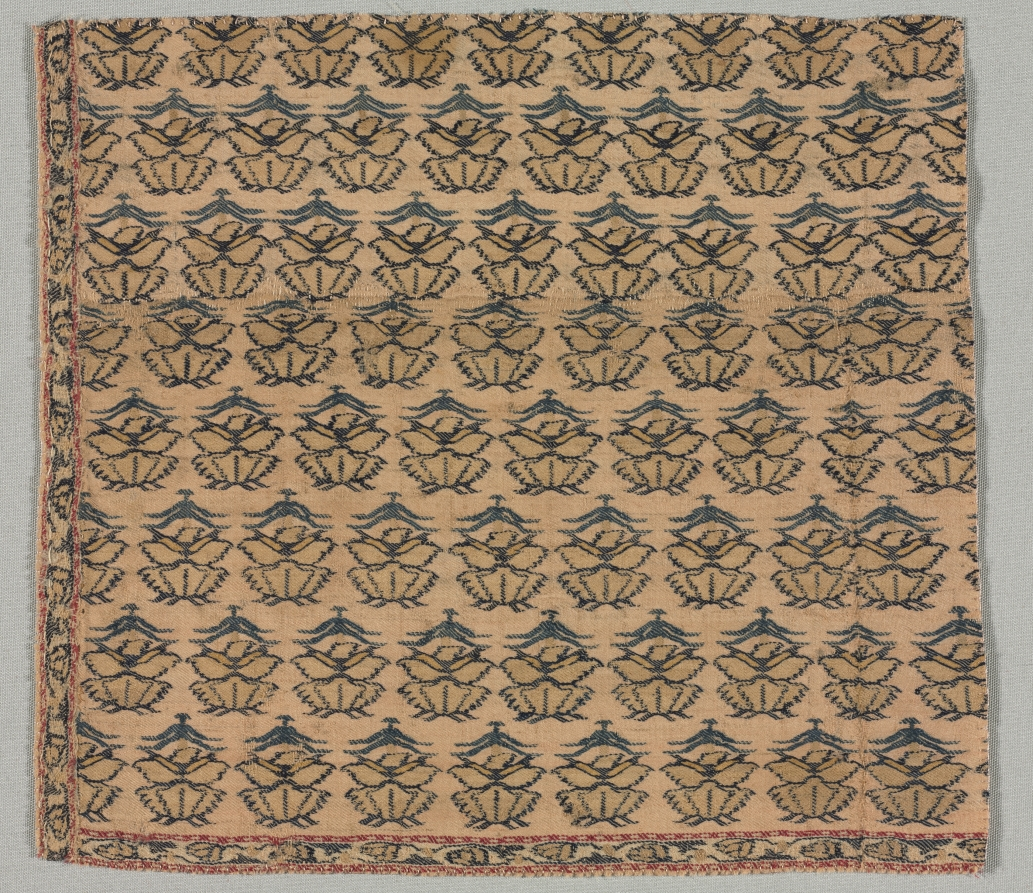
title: Corner Fragment of a Shawl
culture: India, Kashmir, late 18th century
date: late 1700s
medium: tapestry twill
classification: Textile